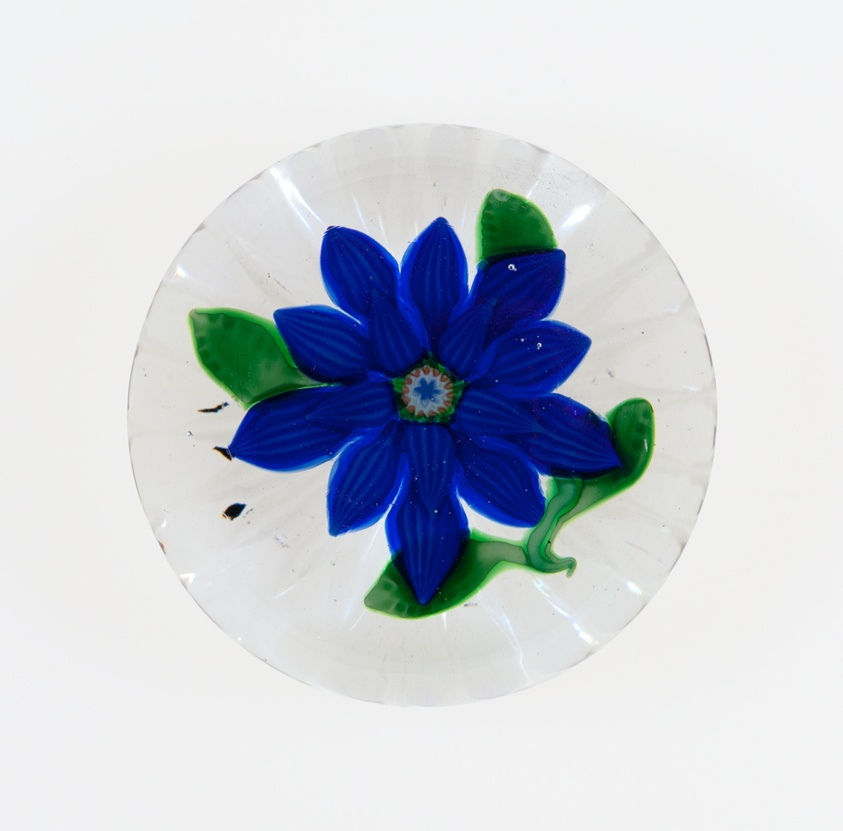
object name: Glass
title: Paperweight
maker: Saint-Louis Glassworks (Cristalleries de Saint-Louis); Lorraine, France, founded 1586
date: c. 1845–60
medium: Glass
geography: Saint-Louis-lès-Bitche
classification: paperweight; glass